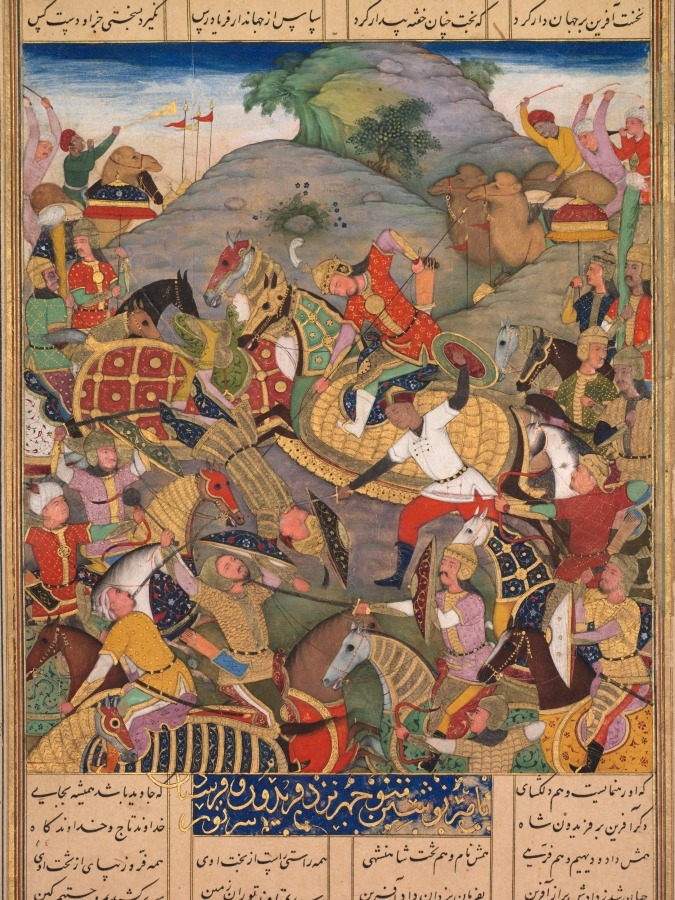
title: Battle between Manuchihr and Tur, from a Shah-nama (Book of Kings) of Firdausi (Persian, c. 934–1020)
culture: Mughal India, court of Jahangir (reigned 1605–27)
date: c. 1610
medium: Gum tempera, ink, and gold on paper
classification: Painting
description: This battle sets the stage for the ages-long enmity in the epic Shah-nama between the people of Iran and Turan—identified as Turkistan, the lands to the east of Iran. The conflict resulted from a bitter family feud that began when a warrior king divided his realm among his three sons; the older two were murderously jealous of the youngest, Iraj, to whom the best lands, those of Iran, were given. In this painting, the warrior in the center is Manuchihr, the grandson of Iraj, avenging his grandfather’s murder by slaying Tur, Iraj’s older brother to whom the less desirable lands of Turan were given. The confusion of battle is skillfully rendered through clustering warriors and warhorses together with varied postures, colors, and patterns.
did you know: Battles were waged to the sound of horns and the beat of drums on camels.